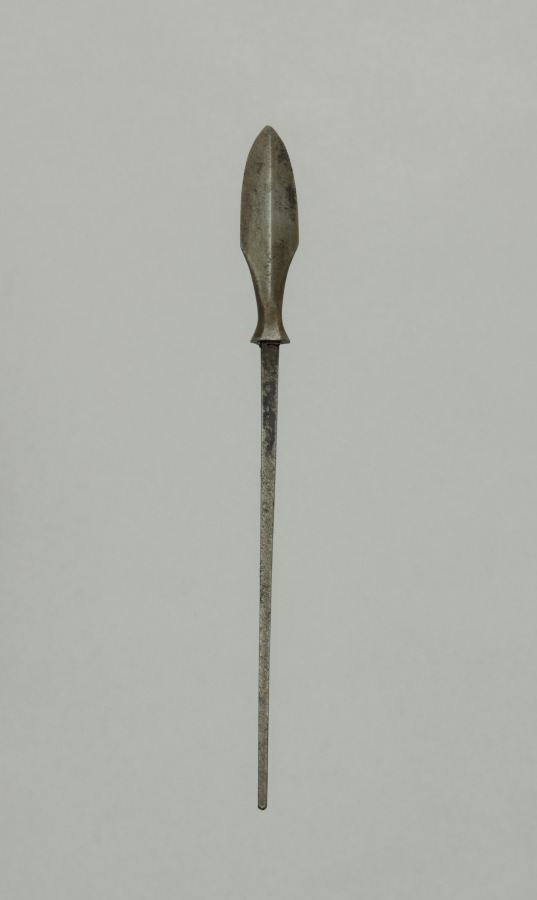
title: Arrow Point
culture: Japan, Edo period (1615–1868)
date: 1700s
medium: steel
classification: Arms and Armor